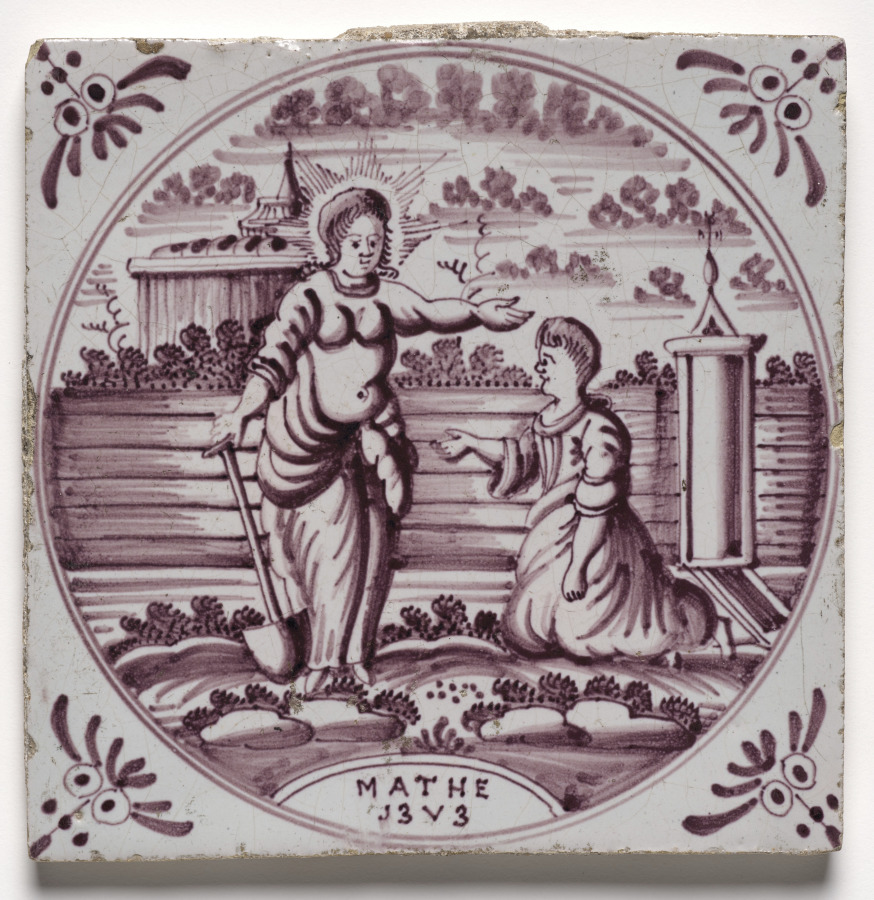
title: Tile- Old Testament Scene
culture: Netherlands, Holland, Delft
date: c 1600s- 1700s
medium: glazed ceramic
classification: Ceramic